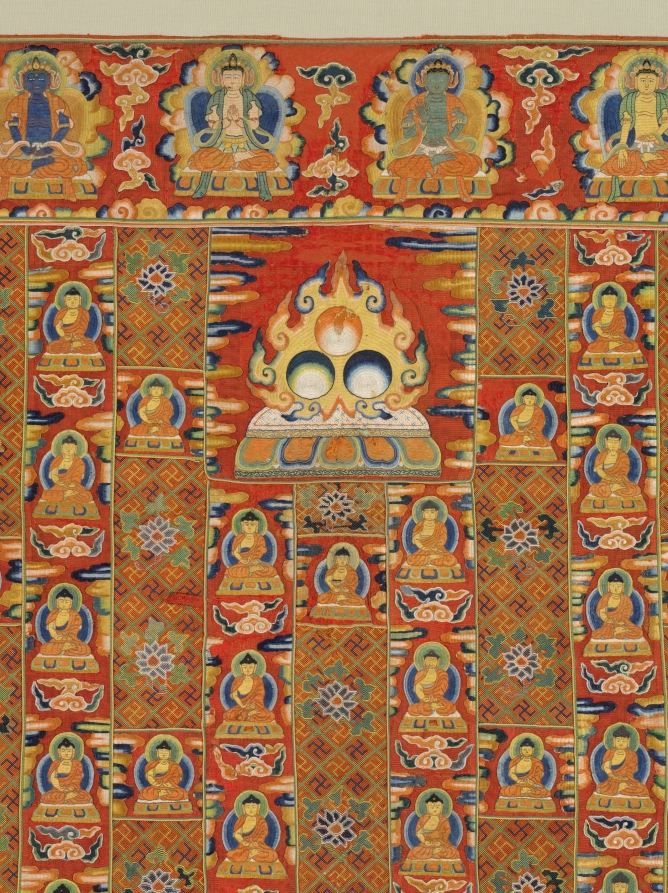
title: Buddhist Priest's Ceremonial Robe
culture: China, Ming dynasty (1368–1644)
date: 1400s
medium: silk and gold thread; embroidery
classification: Garment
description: This example of imperial embroidery is one of the earliest surviving Chinese Buddhist robes (kasaya) in the West. Depicting 991 Buddhas, each slightly different, it is constructed out of patches in reference to the legend in which the Buddha's favorite disciple divided a robe he was given into 30 pieces. Patchwork is also a sign of humility. Multiple Buddha images known as “thousand Buddha” designs are seen painted and sculpted on the walls of cave temples in India, Afghanistan, Central Asia, and China, but are rare on garments. The Four Heavenly Kings, guardians of the four directions, occupy the textile’s corners. When draped around the body, the inverted figures in the upper left corner appear right side up. Robes with 25 columns were worn by the highest-ranking clergy on ceremonial occasions.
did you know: The Five Transcendent Buddhas, who symbolize the purity of the five elements, are repeated around the edges.